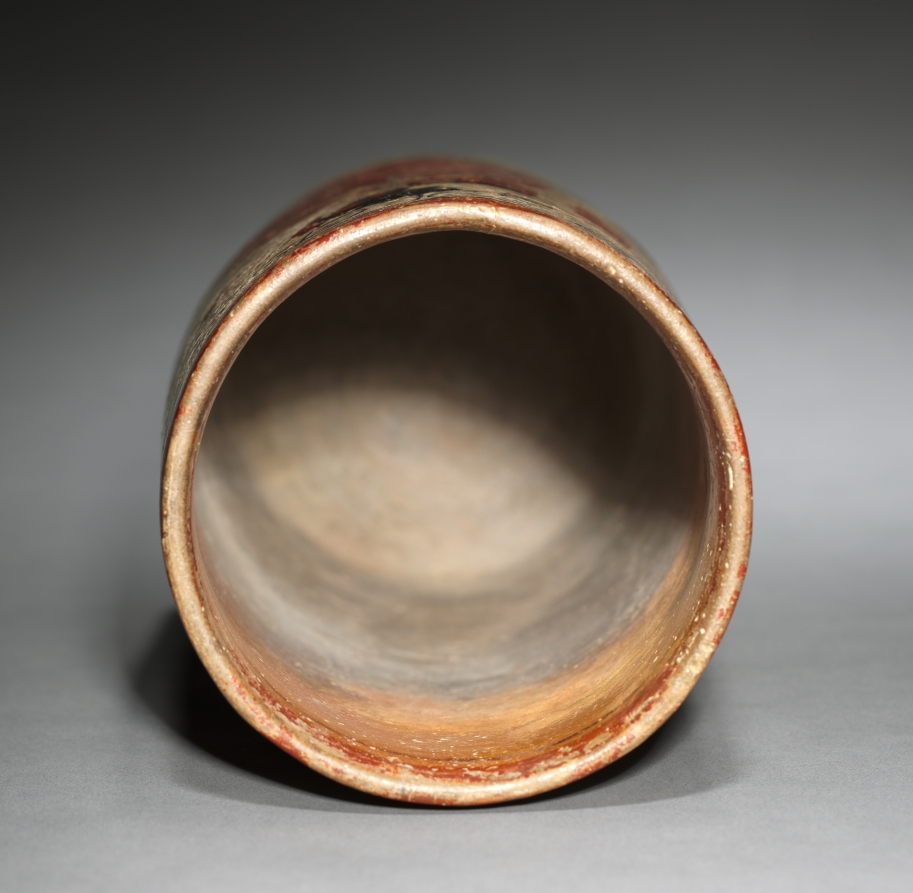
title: Painted Vase with Ruler and Scribe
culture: Guatemala, Northern Peten or Mexico, Southern Campeche, Maya, late Classic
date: 600–900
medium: pottery with burnished, colored slips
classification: Ceramic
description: Among Maya noble families, finely painted ceramic vessels were used as fancy tableware, treasured gifts that secured the support of allies, and funerary offerings placed in tombs. Accordingly, the vessels’ imagery varies from religious themes to scenes of courtly life. Here, two attendants kneel before an enthroned nobleman who wears an enormous bird-head headdress.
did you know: A string of death glyphs below the rim departs from the Primary Standard Sequence.